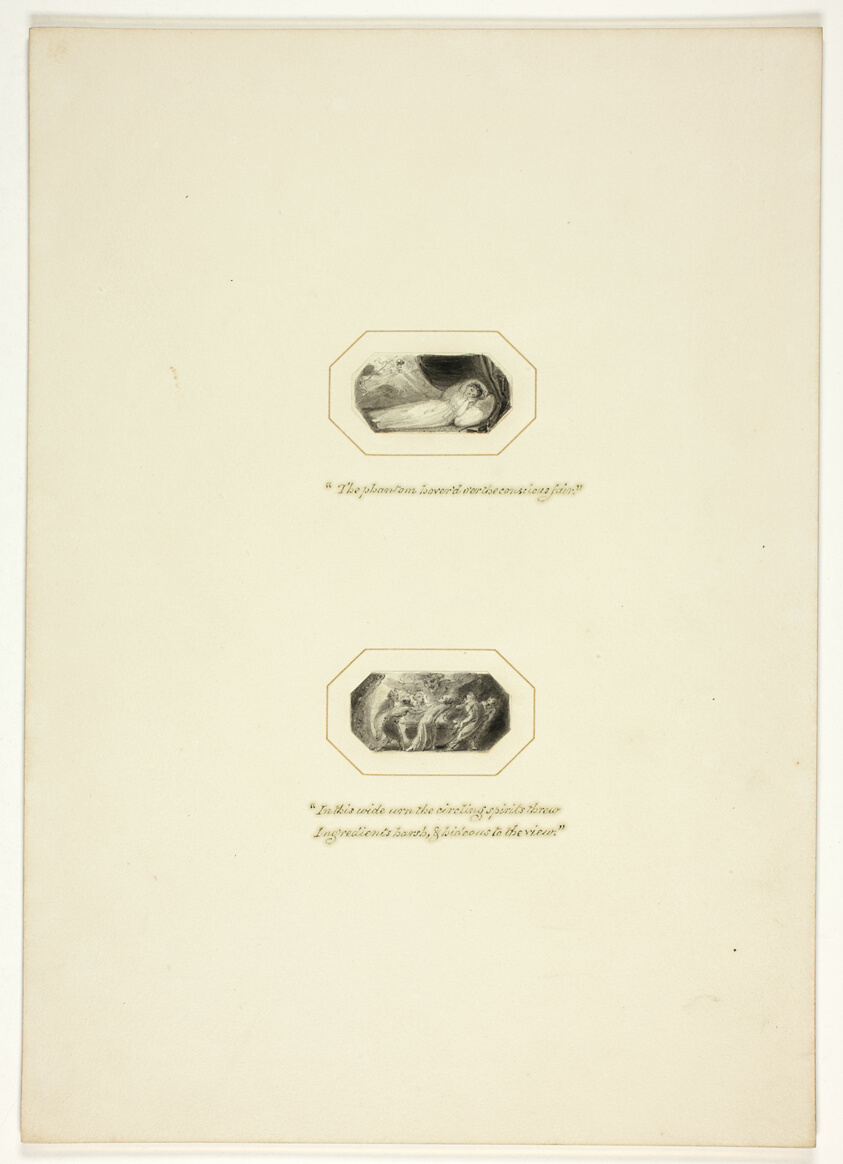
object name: Drawing and Watercolor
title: Study for a plate from The Triumphs of Temper, in the 1796 Royal Engagements Pocket Book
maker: Thomas Stothard (English, 1755-1834)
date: c. 1795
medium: Ink wash on paper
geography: England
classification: ink or chalk wash; drawings (visual works); prints and drawing